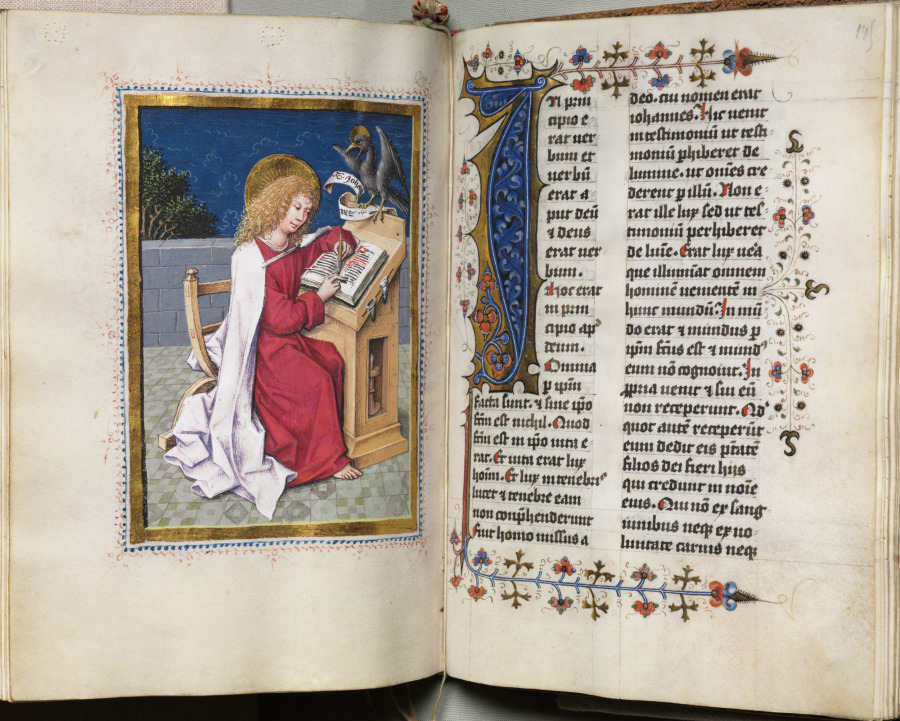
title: Gospel Book with Evangelist Portraits: Saint John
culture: Germany, Middle Rhine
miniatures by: Master of the House-Book (German, c. 1470–1500)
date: c. 1480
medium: ink, tempera, and gold on vellum; original blind stamped leather binding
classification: Bound Volume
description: Each of the four gospels, here in Latin, are preceded by a full-page miniature of the appropriate Evangelist. As is conventional, the Evangelists are represented as contemporary scribes seated at a lectern surrounded by all the accouterments of the trade---inkpots, quill pens, penknives, etc. The miniatures' style is characteristically German late Gothic in its expressive use of angular drapery and realistic detail. Each miniature, however, bears the marks of The Hausbuch Master's hand: notice the terrace space for each figure and the emphasis on realistically rendered details, such as the furniture construction and the tools of the scribe as well as the facial types, with their heavy-lidded, downcast eyes. This artist was occasionally noted for his humor, as here in the portrait of the Evangelist John in which he depicted the saint erasing an error in his text with a pen knife in his left hand and a quill pen in his right. The skillful penwork, tracery, vine scrolls, and the large initials are the work of the other artists. The binding is original. The Hausbuch Master is known primarily for an album of lively drawings as well as some ninety copper engravings. He was also a panel painter of some distinction.